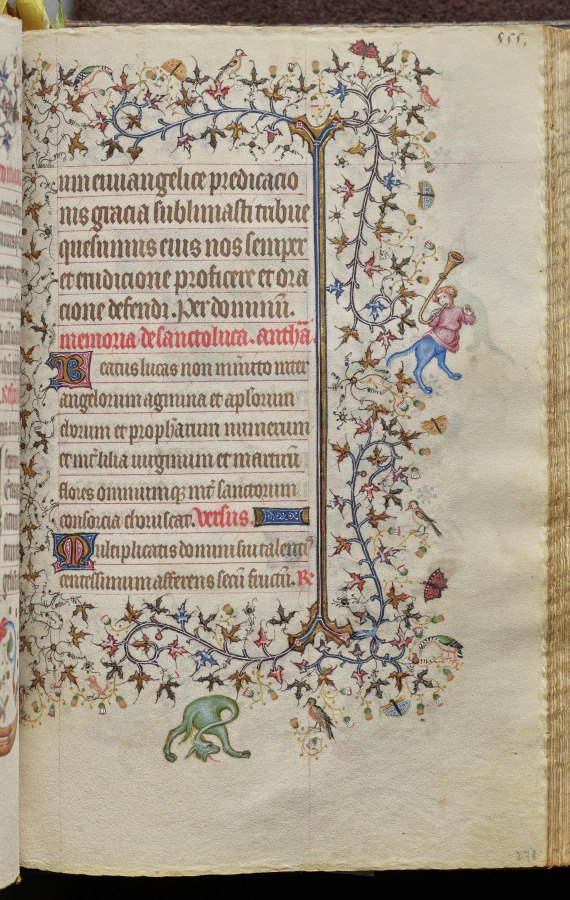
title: Hours of Charles the Noble, King of Navarre (1361-1425): fol. 272r, Text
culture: France, Paris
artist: Master of the Brussels Initials and Associates (French)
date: c. 1405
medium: ink, tempera, and gold on vellum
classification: Bound Volume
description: This precious volume was obviously highly prized by its owner, the French-born King of Navarre, who had his coat of arms painted on no less than twenty folios. Rather than directly commissioning this manuscript from a specific workshop, it seems that Charles the Noble acquired his book of hours -- perhaps ready-made for the luxury market -- while on a trip to Paris in 1404-05. A collaborative effort, six painting styles are evidenced within the pages of this codex, those of two Italians, two Frenchmen, and two Netherlanders. The painter who was responsible for the planning and decoration of the book, and who produced seventeen of the large miniatures, was a Bolognese artist known as the Master of the Brussels Initials. His principal assistant, responsible for most of the borders, was a Florentine who signed his name "Zecho" da Firenze on folio 208 verso.